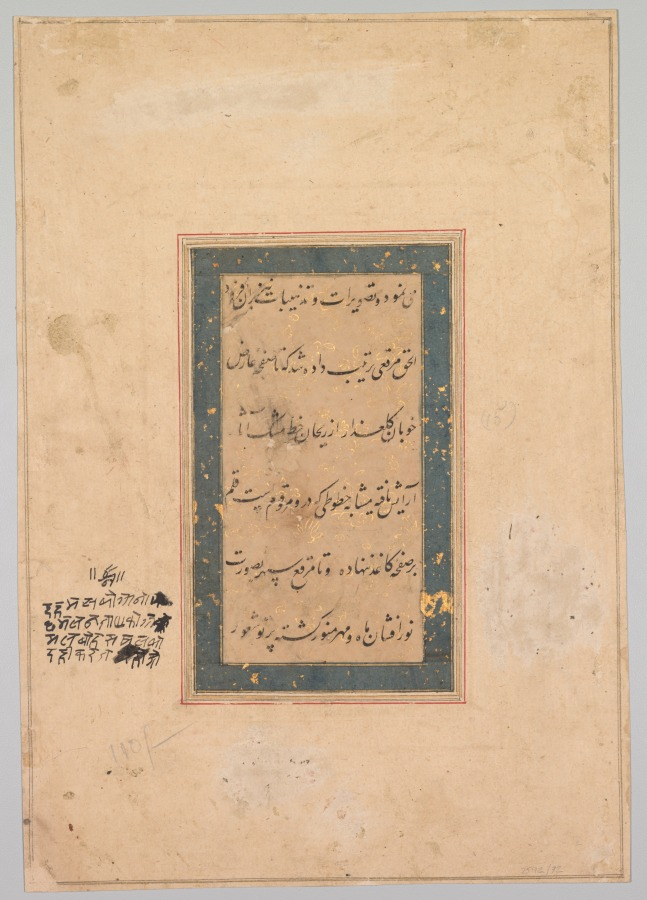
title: Calligraphy: Preface to the Anvar-i Suhaili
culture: Northern India, Mughal court, 16th century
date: c. 1590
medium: Gum tempera, ink, and gold on paper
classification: Calligraphy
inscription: Banyavati inscription in Devenagari script in left margin describing the subject of the miniature: 'We failed to understand each other when we were together, the understanding in that respect may come to us on being separated".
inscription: Persian text in nasta‘liq script: . . . and he also added illustrations and decorations and in truth an album was arranged that ever since the visage of rosy-cheeked beauties has been bedecked by their black sweet-smelling tresses, the like of the calligraphic lines that are written upon it have never been set upon any paper by a pen, and ever since the album of the sky has been illuminated by the luminosity of the moon and the sun, the light of the understanding . . .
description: The lovers have met in a remote wilderness location, away from the city shown in the distance. However, their affair has run its course, and they decide to part ways, each walking in opposite directions through an ominous landscape, where strange rock formations and an oversized serpent-slain by foxes gnawing on its innards-lend a sense of foreboding. As Mughal court painting developed into the last decades of the 16th century, artists began using increasingly muted colors and gentler shading techniques than they did in the more robust Adventures of Hamza at the left. The omission of a light source and shadows adds to a timeless, otherworldly impression to the landscape.